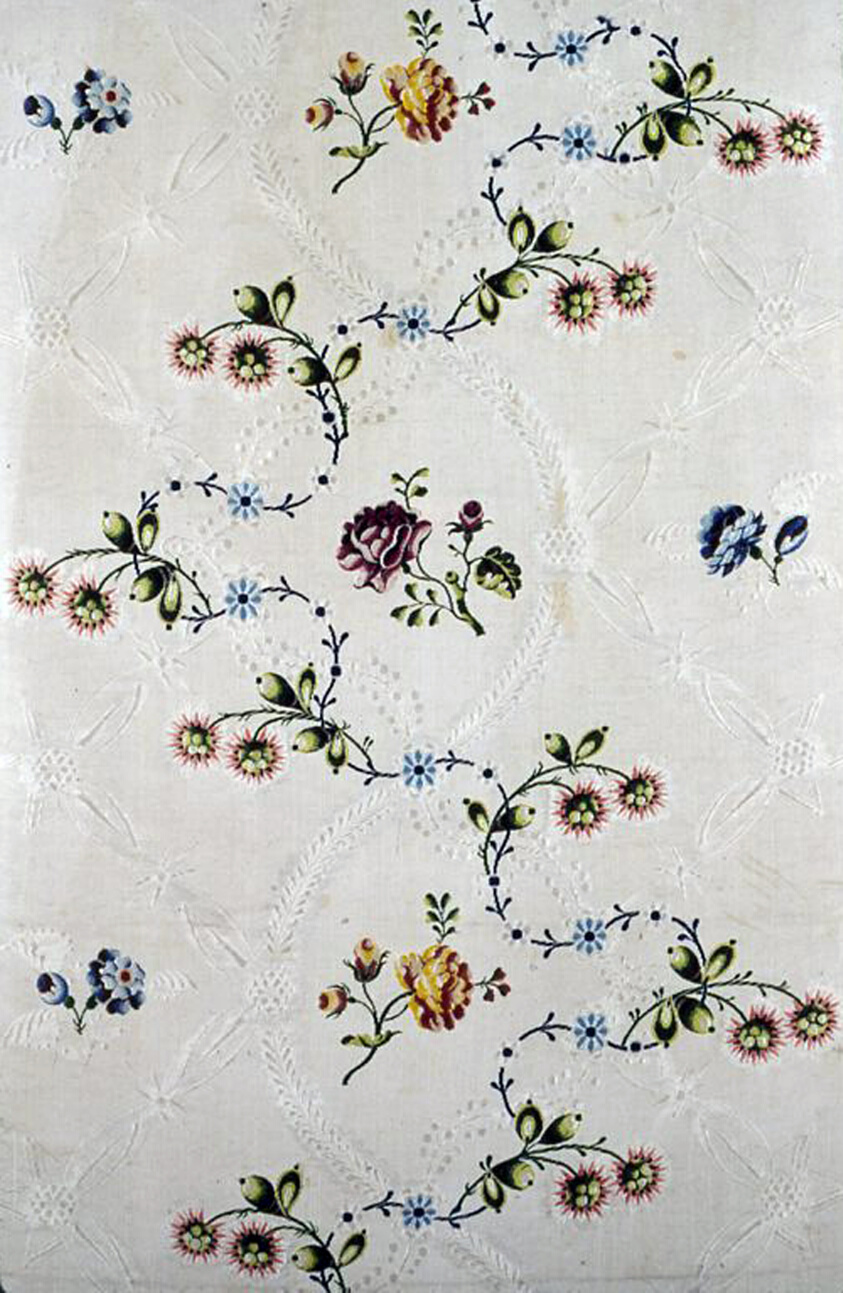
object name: Textile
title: Panel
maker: Possibly after a design by Anna Marie Garthwaite (English, 1690–1763); England, Spitalfields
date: c. 1745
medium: Silk, plain weave with supplementary patterning and brocading wefts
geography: Spitalfields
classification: textile; weaving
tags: flowers, foliage